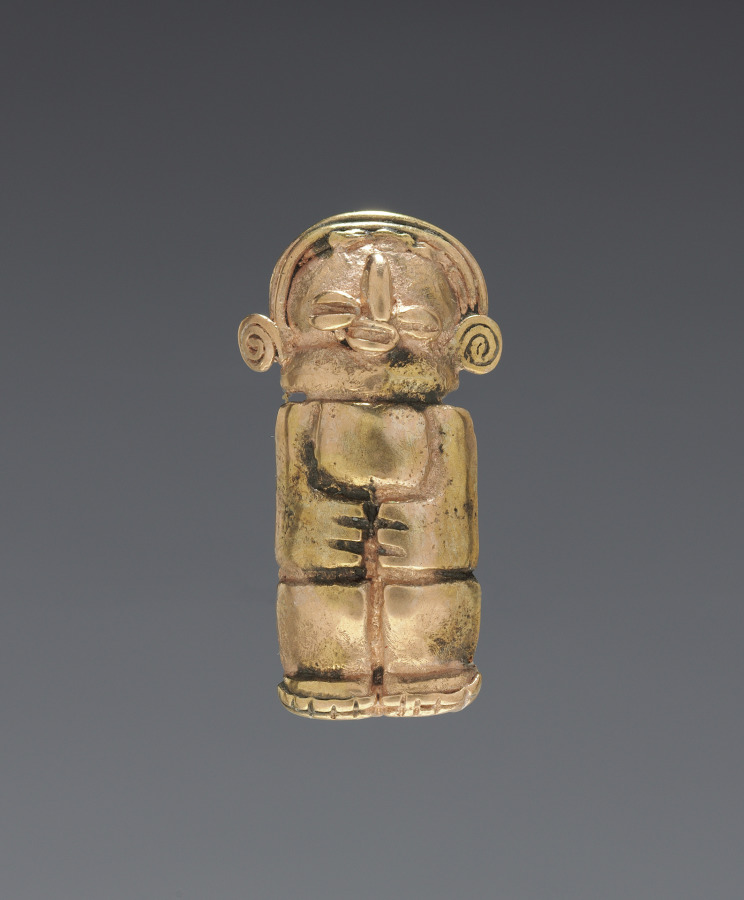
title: Necklace Figurine Bead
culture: Colombia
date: 1–700 CE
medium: cast gold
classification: Jewelry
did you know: Working with gold dates back to at least 500 BC in Ecuador and Colombia.